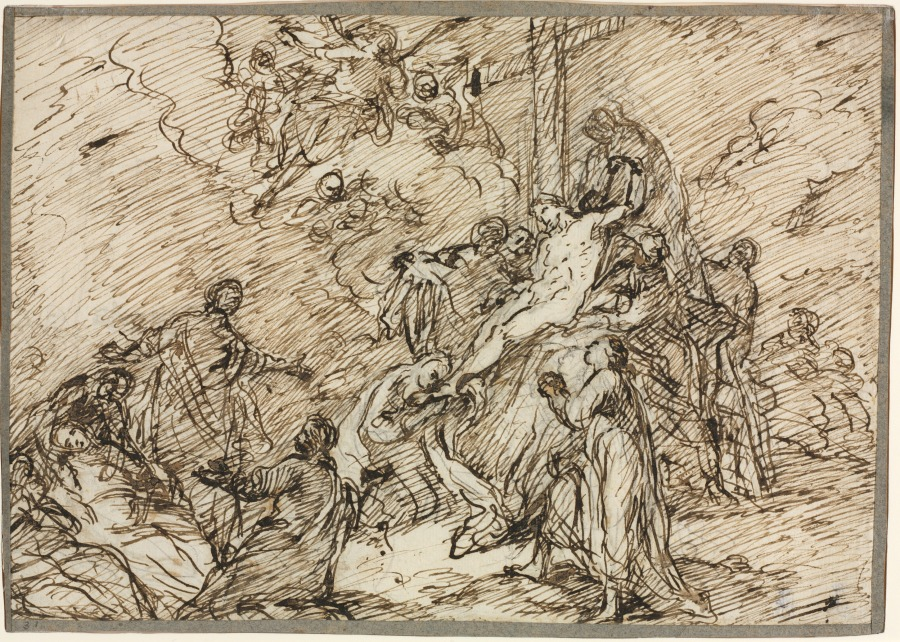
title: The Deposition (recto) and (verso)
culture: Germany, 18th century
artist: Christian Wink (German, 1738–1797)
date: second half 18th century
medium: pen and brown ink over black chalk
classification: Drawing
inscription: lower left, on paper strip mounted to perimeter of drawing, in graphite: 31